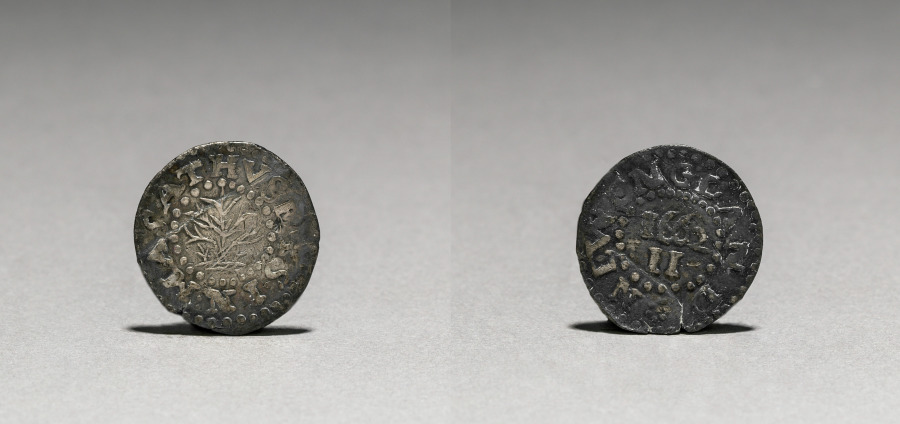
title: Oak Tree Two Pence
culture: America, Massachusetts, Boston, 17th century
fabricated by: John Hull (American, 1624–1683)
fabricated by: Robert Sanderson (American, 1609–1693)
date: 1662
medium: silver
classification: Coins